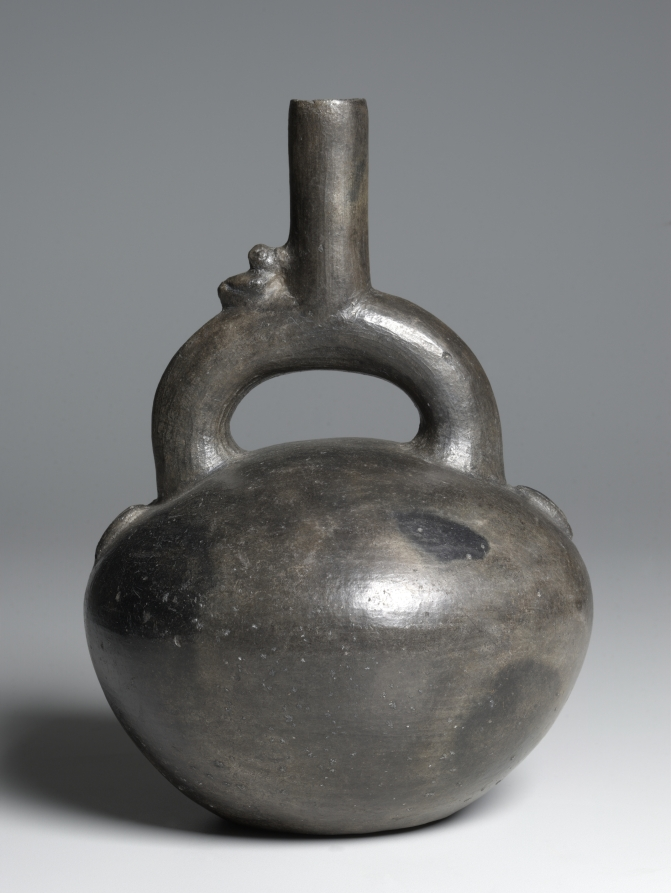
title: Darkware Vessel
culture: Peru, North Coast, Chimú style (900-1470)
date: Chimú style (900–1470)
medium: black ware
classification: Ceramic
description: Under the Chimú, whose empire stretched for 800 miles along the Peruvian north coast, the value of ceramics fell, perhaps because high-status vessels were made of precious metals. Accordingly, ceramics were mass-produced with molds and, rather than bearing painted scenes, often have an overall dark surface achieved by firing in a smoky atmosphere. This firing method was also used for very early Andean ceramics, including the example at the far left. We don't know whether the Chimú revived the method to venerate earlier cultures. The vessel with the stripped surface was made after the Chimú were conquered by the Inka in the late 1400s.